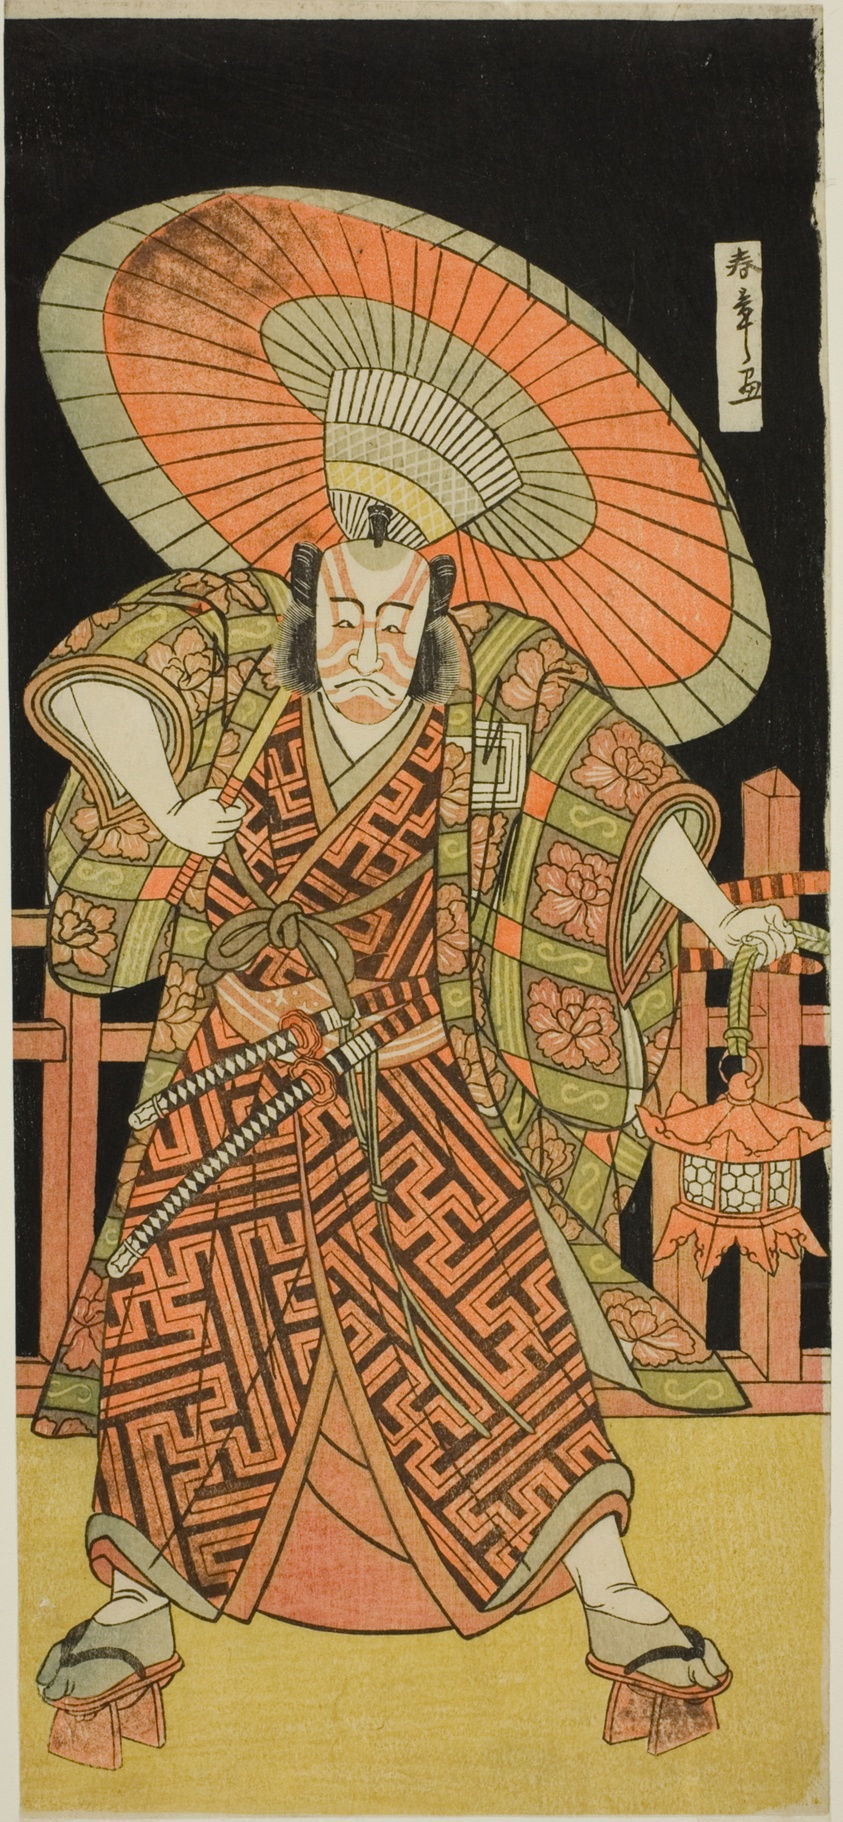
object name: Print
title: The Actor Ichikawa Danjuro V as Kazusa no Gorobei Tadamitsu in the Play Kitekaeru Nishiki no Wakayaka, Performed at the Nakamura Theater in the Eleventh Month, 1780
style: Japanese (culture or style)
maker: Katsukawa Shunsho 勝川 春章; Japanese, 1726-1792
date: c. 1780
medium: Color woodblock print; hosoban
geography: Japan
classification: woodblock print; print; asian art